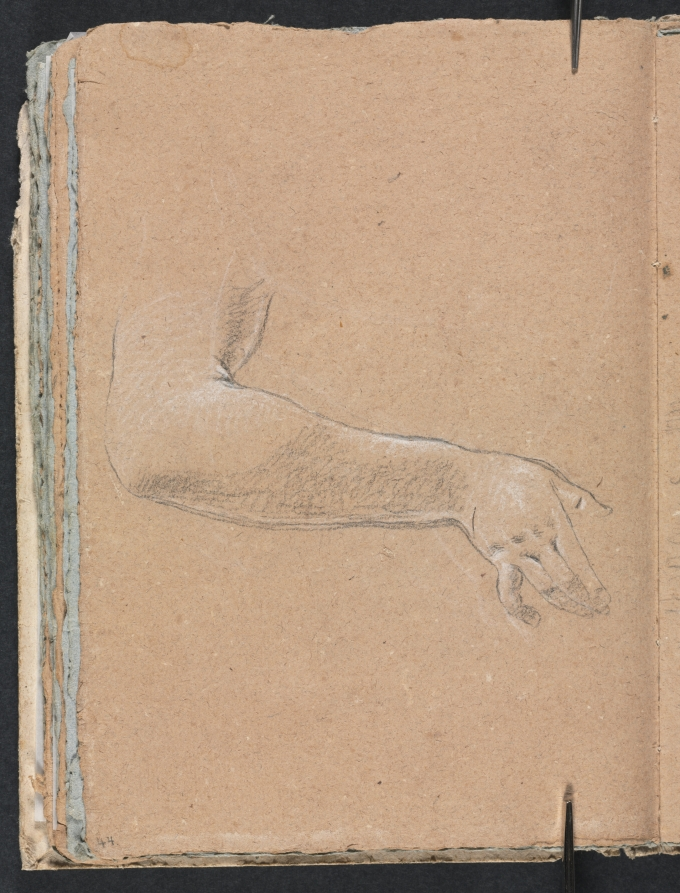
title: Verona Sketchbook: Female right arm and hand (page 44)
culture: Italy, 18th century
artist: Francesco Lorenzi (Italian, 1723–1787)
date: 1760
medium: black chalk with white heightening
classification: Bound Volume